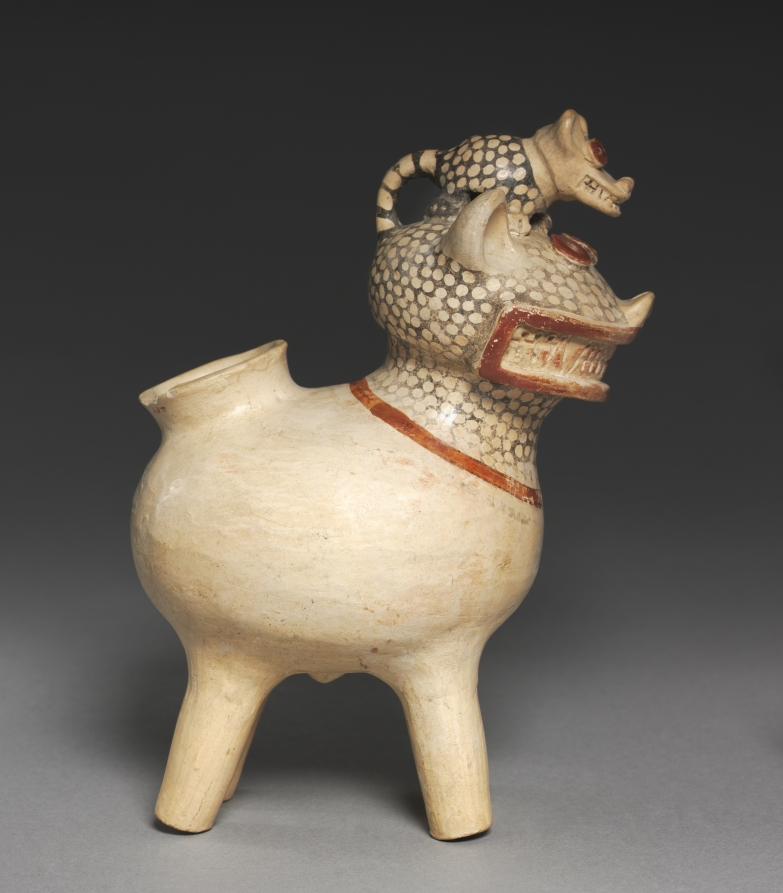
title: Feline Vessel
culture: Central Andes, North Highlands, Recuay people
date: 1–700 CE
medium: ceramic, red and white slips, black pigment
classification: Ceramic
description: Recuay art is under-studied and it is difficult to know the meaning of the wonderfully stylized feline on whose head perches a small passenger that may be a coatimundi, a nosy, busy, racoon-like animal. Elsewhere in Recuay art, felines are shown as virile predators, making it likely that in general they were symbols of leadership. The feline is painted with white and red slips; after firing, a resist application of black pigment was used to create the dotted pattern.